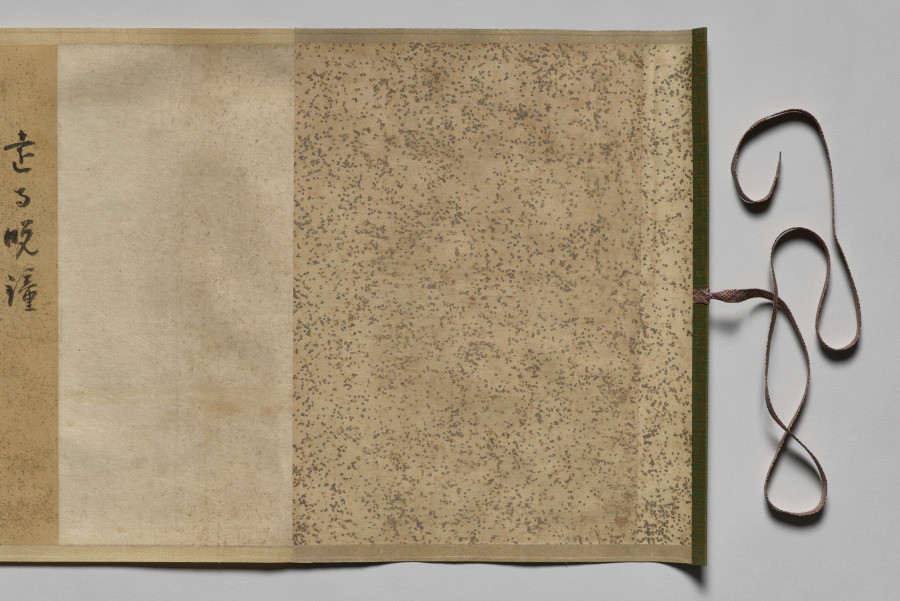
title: Poems and Pictures of the Eight Views of Xiao-Xiang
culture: Japan, Momoyama period (1573–1615)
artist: Unkoku Tōgan (Japanese, 1547–1618)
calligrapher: Inkei Gentetsu (Japanese, 1562–1612)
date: 1605–12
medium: Handscroll; ink on paper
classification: Painting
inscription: Each painting sealed with red gourd-shaped seal reading Unkoku (雲谷) and a square seal reading Tōgan (等顔).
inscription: Each painting prefaced with a titled poem on the Eight Views of Xiao-Xiang by Yujian Ruofen (active late 13th century) inscribed by Japanese Buddhist monk Inkei Gentetsu (1562–1612).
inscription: 右寫玉㵎之筆勢／雪舟末葉等顔筆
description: Unkoku Tōgan brushed these scenes using the splashed-ink technique associated in Japan with the Chinese monk Yujian Ruofen (active late 1200s). Xiao-Xiang refers to the region in present-day Hunan province, where the Xiang River and its tributaries converge. Each of the eight views evokes a time of day or season. The earliest surviving series of Xiao-Xiang paintings is by Wang Hong (active mid-1100s), but textual evidence tells us the theme appears earlier. It was later adopted in Japan and Korea, as seen here. The poems were inscribed by Inkei Gentetsu, the third abbot of the Rinzai Zen temple Tōshunji, Japan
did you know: The “Tō” of Tōgan comes from the name of painter Sesshū Tōyō (1420–1506).